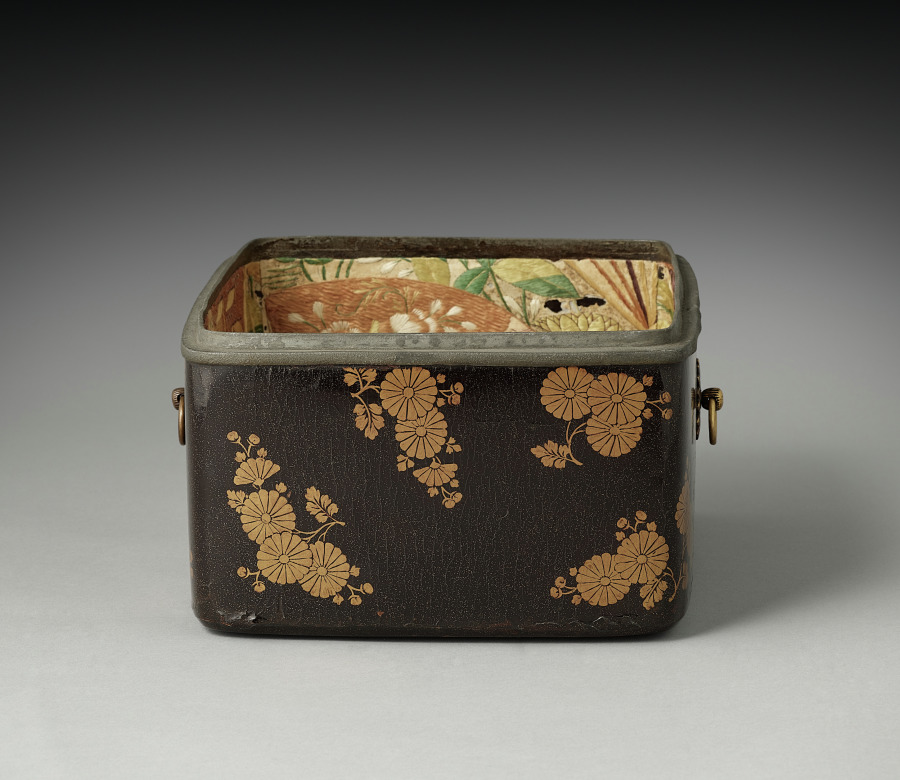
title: Cosmetics Box with Chrysanthemums (base)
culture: Japan, Kamakura period (1185–1333)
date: early 1300s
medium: lacquer on wood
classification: Lacquer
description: In China, the chrysanthemum was historically appreciated for its association with the Double Nine Festival and the reclusive life of the poet Tao Yuanming (AD 365-427). In Japan, the 16-petaled chrysanthemum came to symbolize the Japanese imperial family after Emperor Gotoba (1180-1239) chose the motif as his personal emblem, having it applied to his sword and everyday utensils. This box proves that the flower also appeared on lacquer wares as early as the Kamakura period.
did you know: In Japanese, this type of small box is called a tebako, literally a hand box, and was typically part of a cosmetics set.